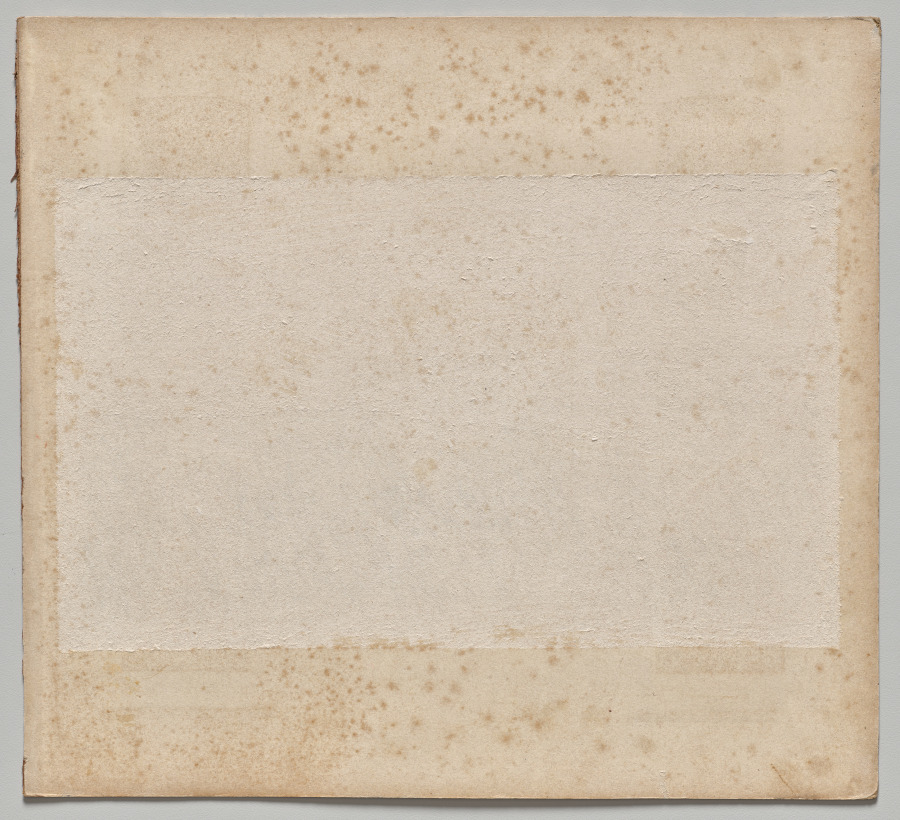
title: Maharaja Ranbir Singh of Jammu and Kashmir with Sons and Courtiers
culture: Northern India, Pahari kingdoms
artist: Bourne & Shepherd (British, active India, 1868–2016)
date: 1870s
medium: albumen print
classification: Photograph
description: Ranbir Singha (1830-1885) was a Pahari raja and son of the founder of the Jammu and Kashmir state, which he ruled for almost 30 years. He established a modern judicial code and a silk factory in his state and was a scholar of the Sanskrit and Persian languages. One of his four sons—it is not known which one—sits beside him for this portrait.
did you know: Anchoring the center of this oval composition is the maharaja, resplendent in richly embroidered robes and jewels and wearing a sword and a dagger.